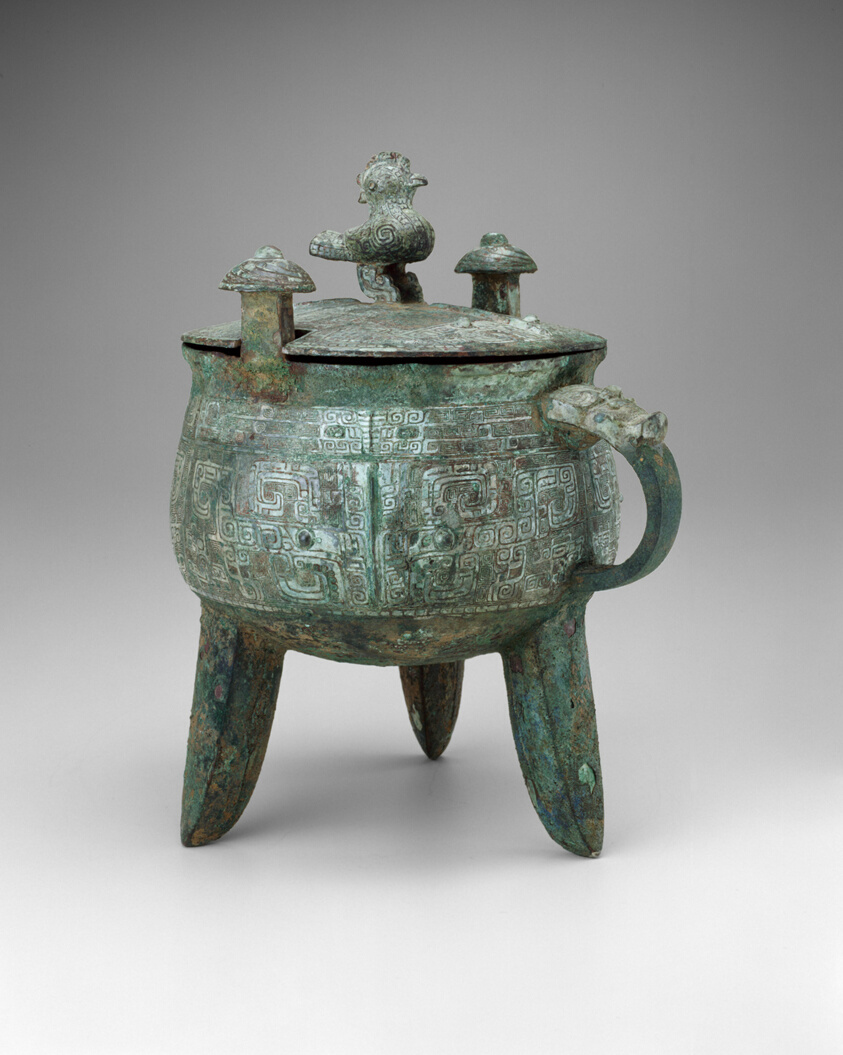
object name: Vessel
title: Goblet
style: Chinese (culture or style)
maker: China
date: Shang dynasty ( about 1600–1046 BC ), 13th/12th century BC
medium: Bronze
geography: China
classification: vessel; vessel for serving drinks; bronze; metal; asian art